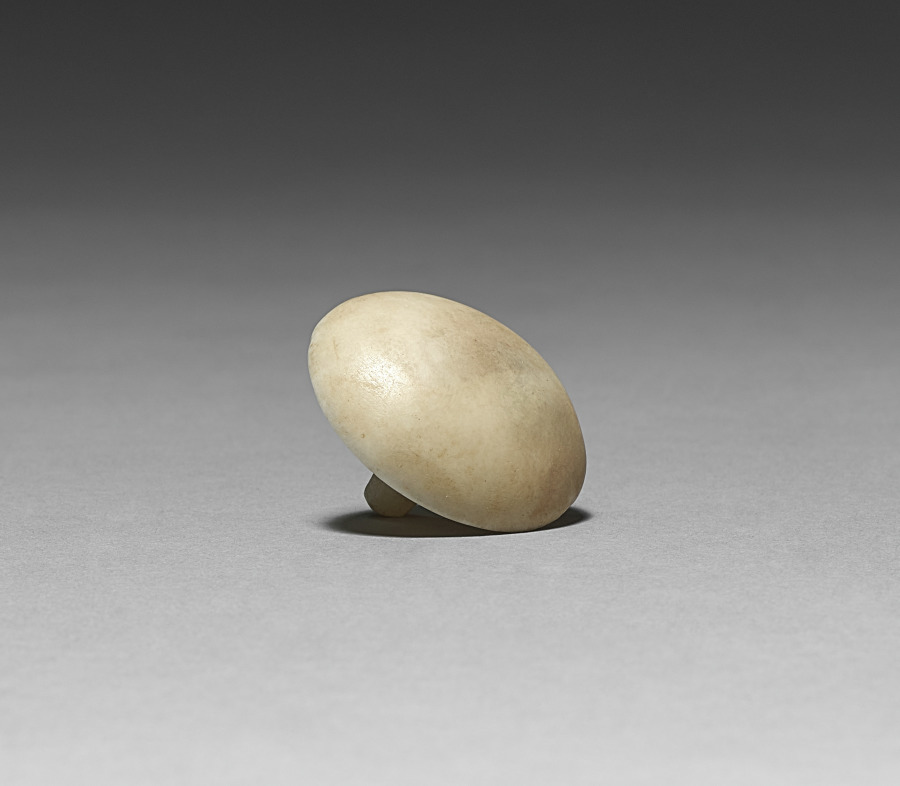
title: Earring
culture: Egypt, New Kingdom (1540–1069 BCE), Dynasty 18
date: 1540–1296 BCE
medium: travertine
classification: Jewelry